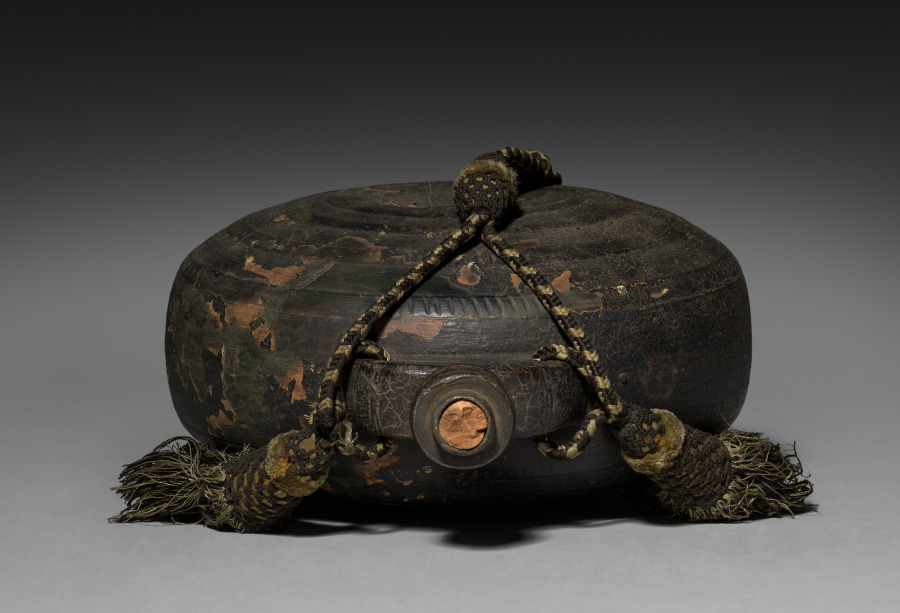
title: Powder Canister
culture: Italy, 18th century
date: 1700s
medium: wood painted black, lead charger, pewter mount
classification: Arms and Armor